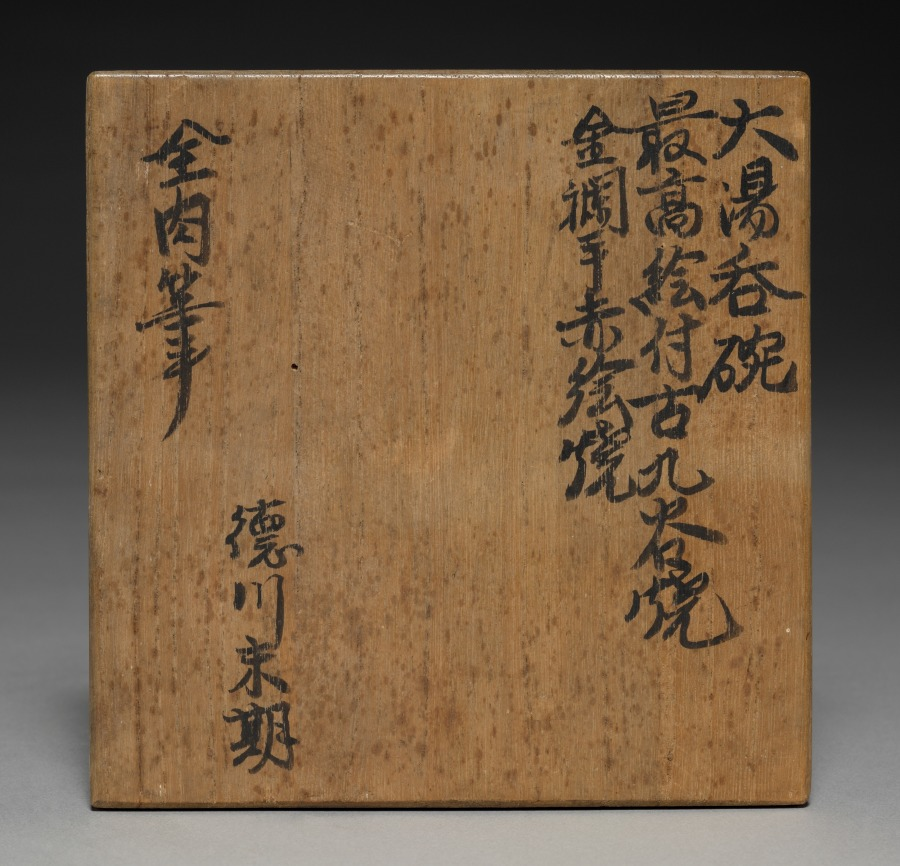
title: Cup with Plum and Rock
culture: Japan, Edo period (1615–1868)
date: 1700s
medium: porcelain with underglaze blue and overglaze enamel decoration (Hizen ware, Ko-Kutani type)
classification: Ceramic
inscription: 福